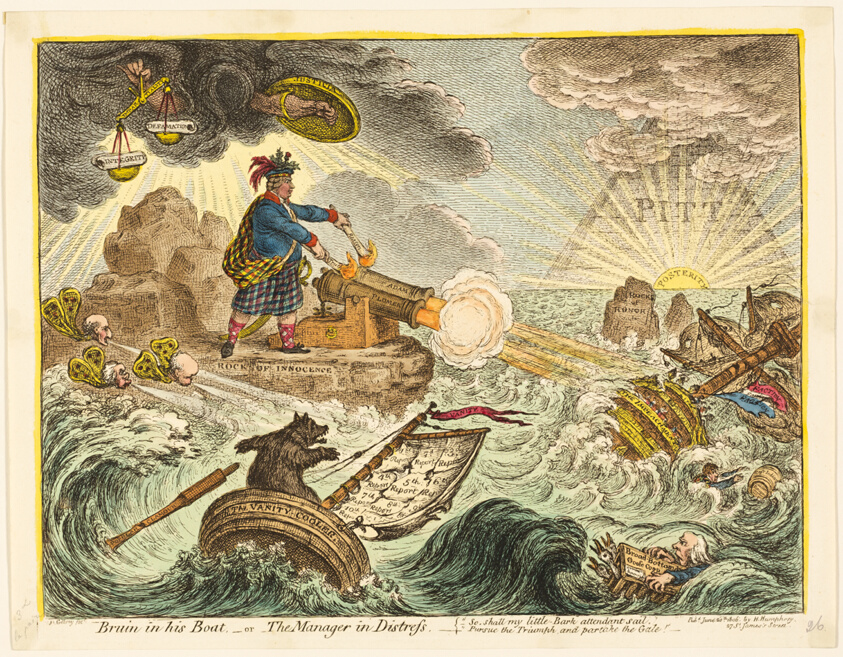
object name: Print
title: Bruin in his Boat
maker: James Gillray (English, 1756-1815); published by Hannah Humphrey (English, c. 1745-1818)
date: published June 20, 1806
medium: Hand-colored etching on paper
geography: England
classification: etching; print; prints and drawing